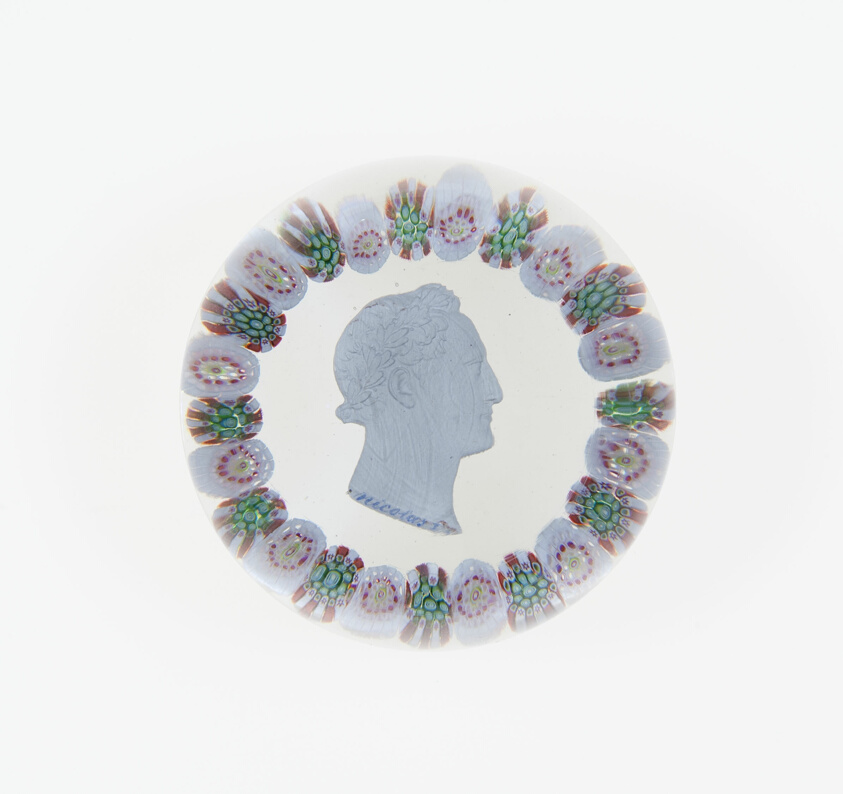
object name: Glass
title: Paperweight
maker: Saint-Louis Glassworks (Cristalleries de Saint-Louis); Lorraine, France, founded 1586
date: c. 1846–55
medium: Glass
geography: Saint-Louis-lès-Bitche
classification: paperweight; sulphide (glass); european decorative arts; glass